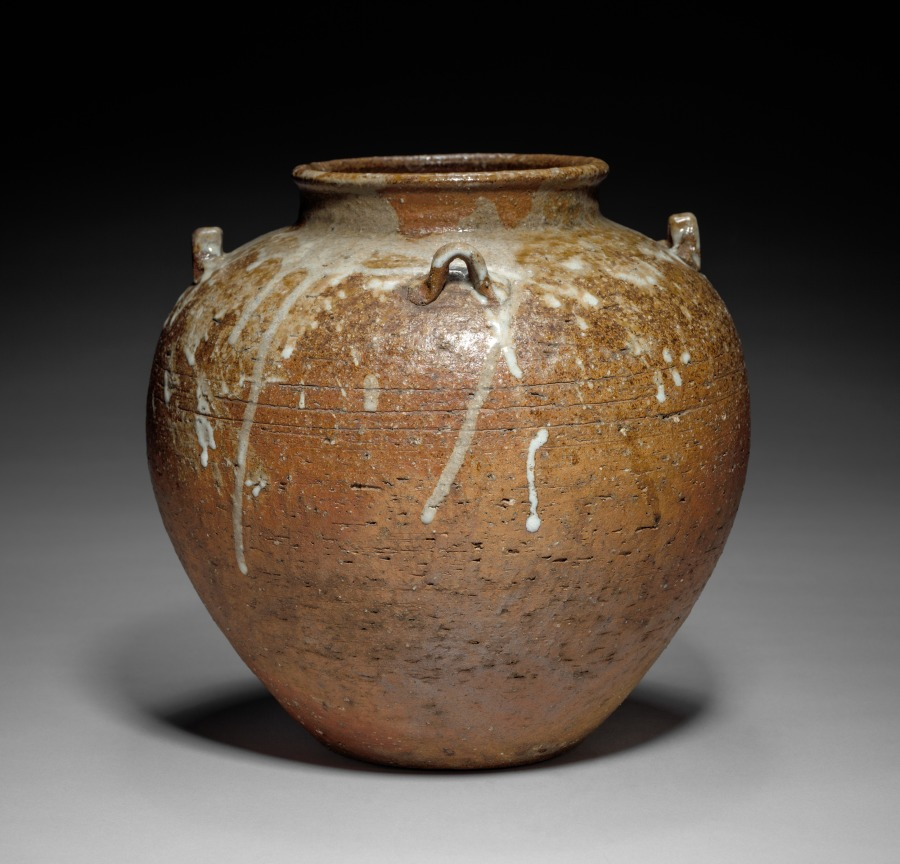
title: Tea Storage Jar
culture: Japan, Edo period (1615–1868)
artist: Nonomura Ninsei (Japanese, active 1640s–90s)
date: mid- to late 1600s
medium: Stoneware with white glaze (Shigaraki style)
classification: Ceramic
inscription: Ninsei seal impressed in the clay on bottom.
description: In this tea storage jar, Nonomura Ninsei reinterpreted a Shigaraki stoneware—made to hold agricultural products and known for its warm orange color, asymmetrical round forms, and irregular natural ash glazes—to produce a more refined piece that would appeal to tea masters seeking a touch of rusticity. In Japanese tea culture, hanging scroll paintings or calligraphy are placed in the tokonoma, or viewing alcove, for participants to admire and discuss along with the utensils used in the gathering. The scrolls are typically paired with vessels containing seasonal floral arrangements.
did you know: This jar may be considered an example of the aesthetic known as kireisabi, or refined rusticity.